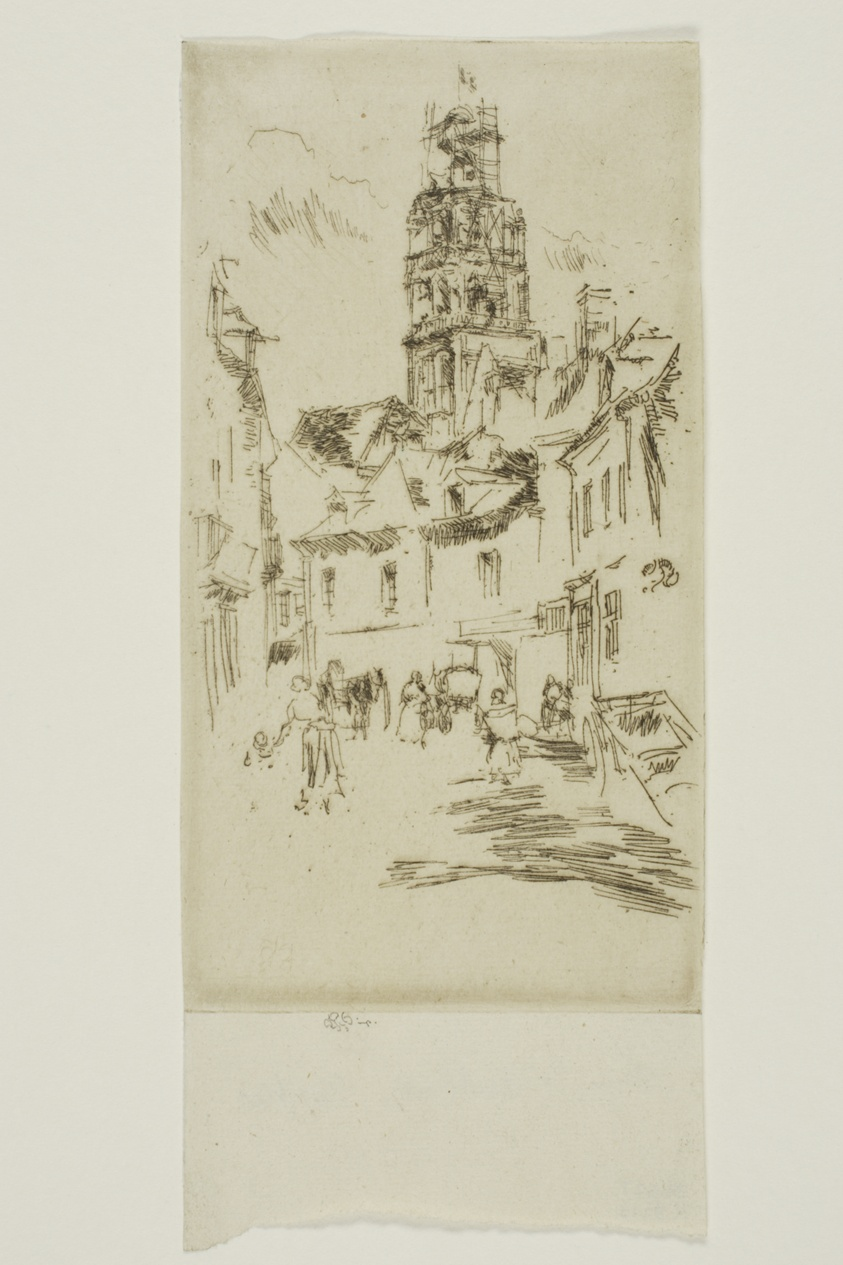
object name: Print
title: Tour Saint Antoine, Loches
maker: James McNeill Whistler (American, 1834-1903)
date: 1888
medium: Etching with foul biting in dark brown ink on cream laid paper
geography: United States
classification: etching; foul biting; print; prints and drawing; paper